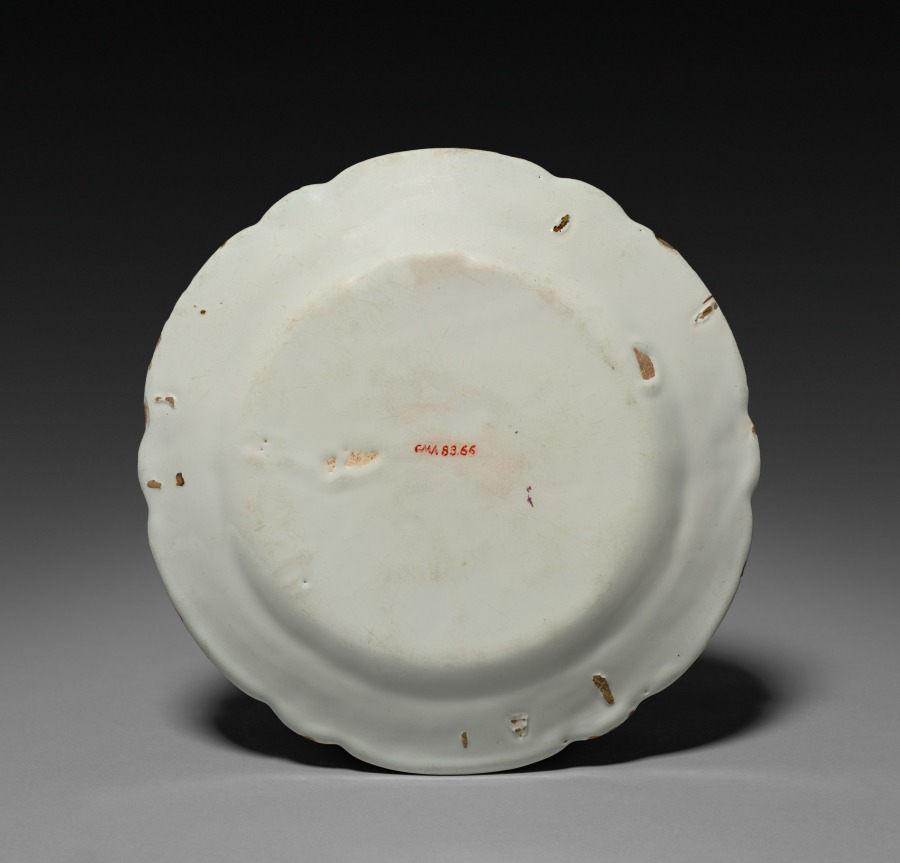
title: Plate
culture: France, 18th century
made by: Rouen Factory (French)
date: c. 1775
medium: faience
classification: Ceramic